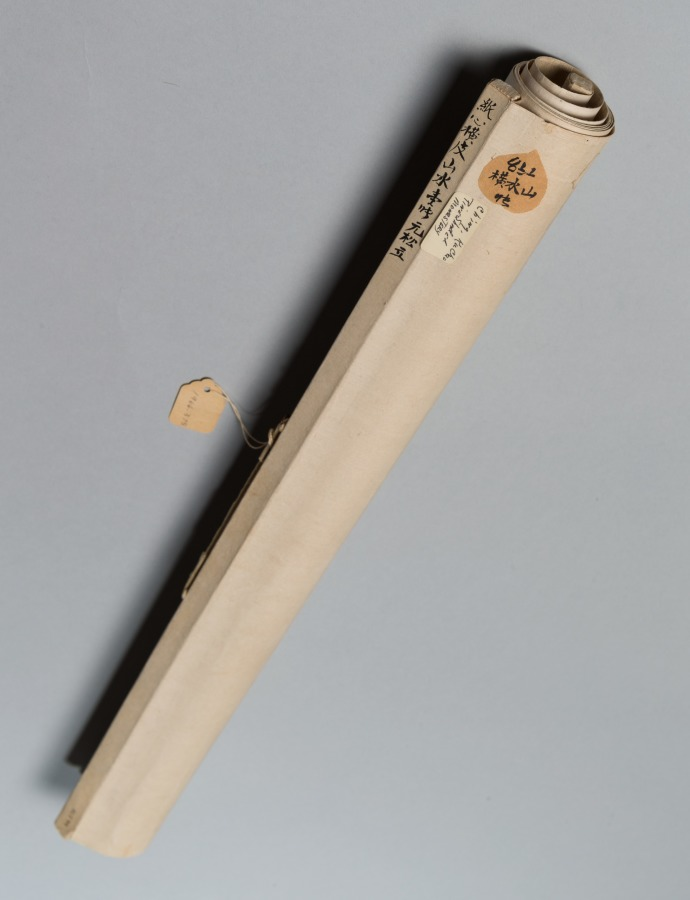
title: Pine-shaded Monastery on a Cloudy Mountain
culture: China, Qing dynasty (1644-1911)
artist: Gu Chao (Chinese, active late 1700s)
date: late 1700s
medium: handscroll, ink and slight color on paper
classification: Painting